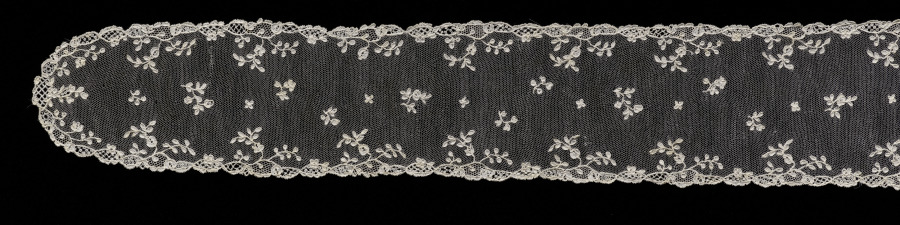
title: Pair of Lace Lappets, joined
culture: France, Alençon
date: 1774–92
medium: Linen: needle lace (Point d'Alençon)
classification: Lace